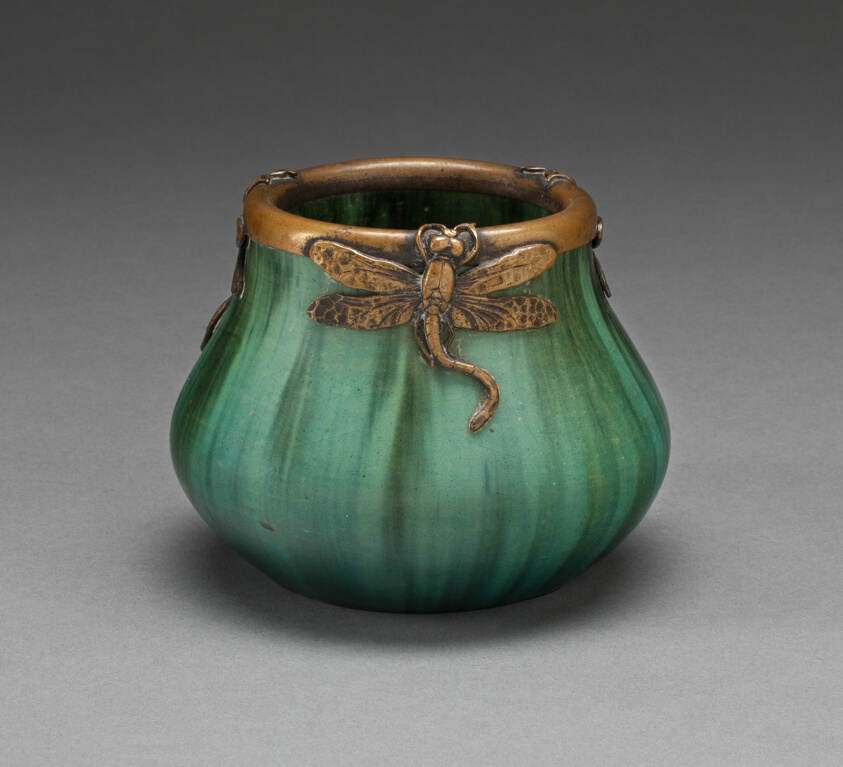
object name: Ceramics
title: Vase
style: Art Nouveau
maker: France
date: c. 1900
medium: Glazed earthenware, brass mounts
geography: France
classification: vase; vessel; european decorative arts; ceramics; earthenware